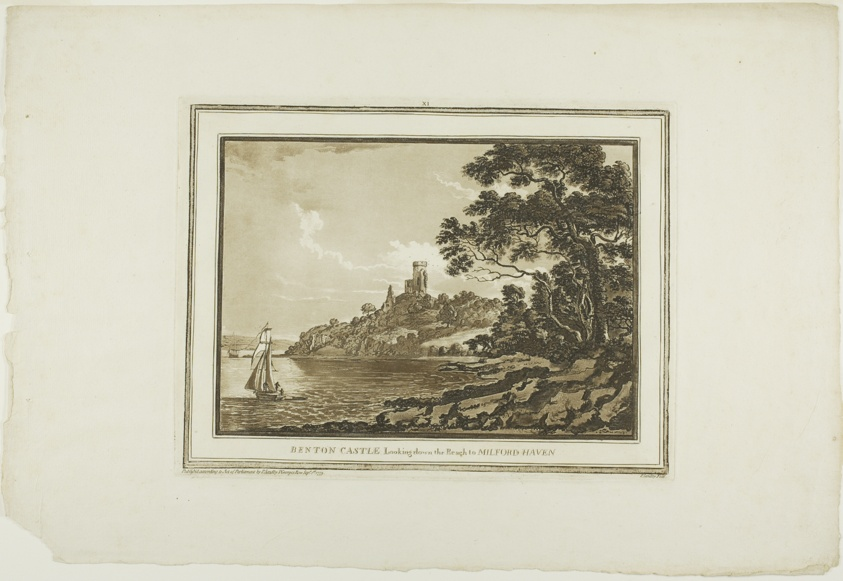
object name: Print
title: Benton Castle Looking down the Reach to Milford Haven, plate eleven from Twelve Views in South Wales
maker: Paul Sandby (English, 1731-1809)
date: 1775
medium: Aquatint with etching on ivory laid paper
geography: England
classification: etching; print; prints and drawing